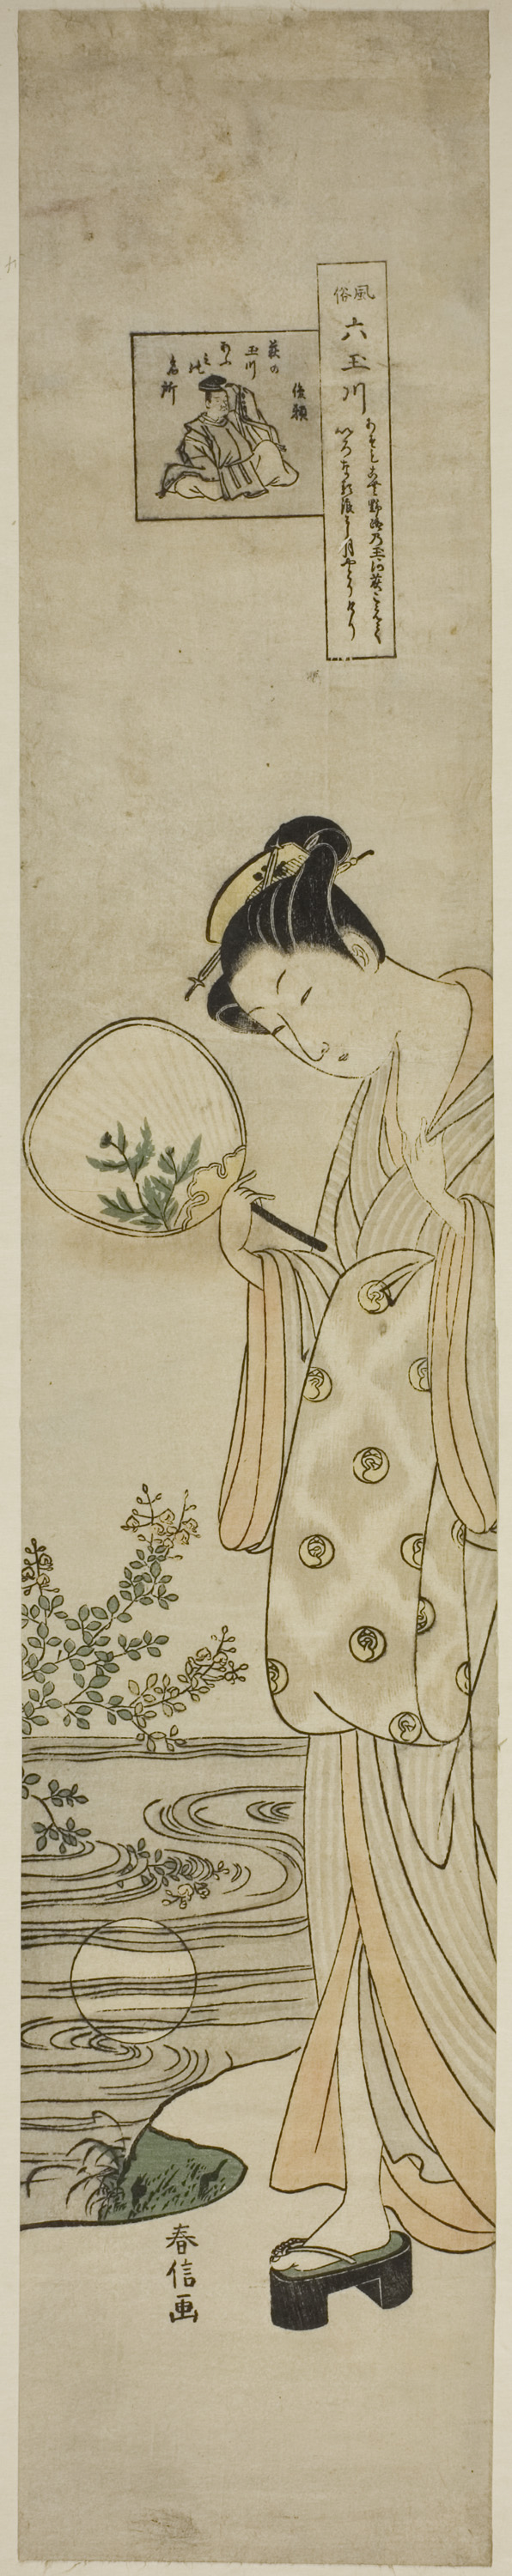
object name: Print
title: The Jewel River of Bush Clovers (Hagi no Tamagawa), from the series "Six Jewel Rivers in Popular Customs (Fuzoku Mu Tamagawa)"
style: Japanese (culture or style)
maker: Suzuki Harunobu 鈴木 春信; Japanese, 1725 (?)-1770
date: c. 1769/70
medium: Color woodblock print; hashira-e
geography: Japan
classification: woodblock print; print; asian art